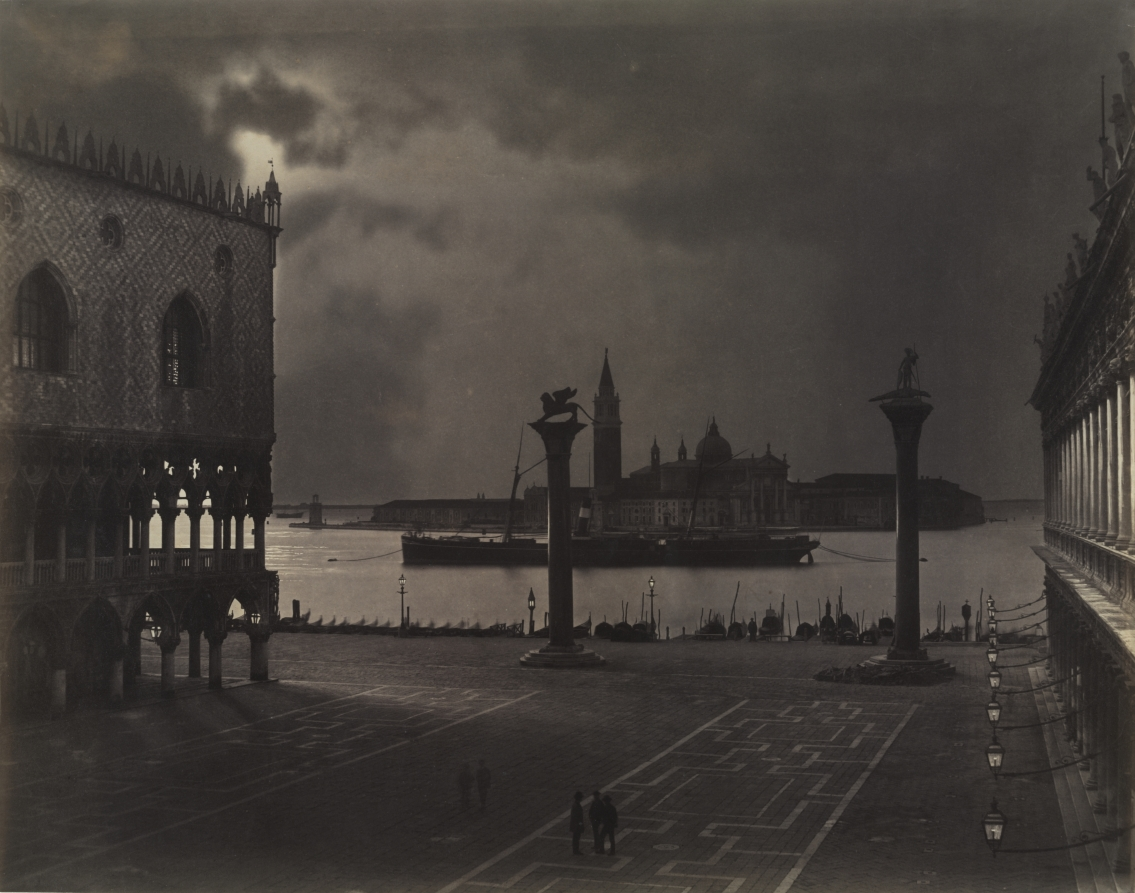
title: Venice: Saint Mark's Looking toward San Giorgio Maggiore, in Moonlight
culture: Italy, 19th century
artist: Carlo Naya (Italian, 1816–1882)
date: c. 1870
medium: albumen print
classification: Photograph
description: This romantic view of a nearly empty, moonlit Piazza San Marco is a tourist’s dream of Venice—and dream it is, rather than reality. The light-sensitive coatings of photographic negatives around 1870 were unable to record such detail in the dark, so Carlo Naya photographed his celebrated nocturnes during the day then manipulated the exposure in the darkroom. The highlights on the water and on the columns on the right, along with all the gaslight flames, were hand painted on the negative (he missed one lamp on the left). The sun, conveniently hidden behind a cloud, becomes the moon.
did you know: Nowadays Venice usually receives between 26 and 30 million visitors annually.